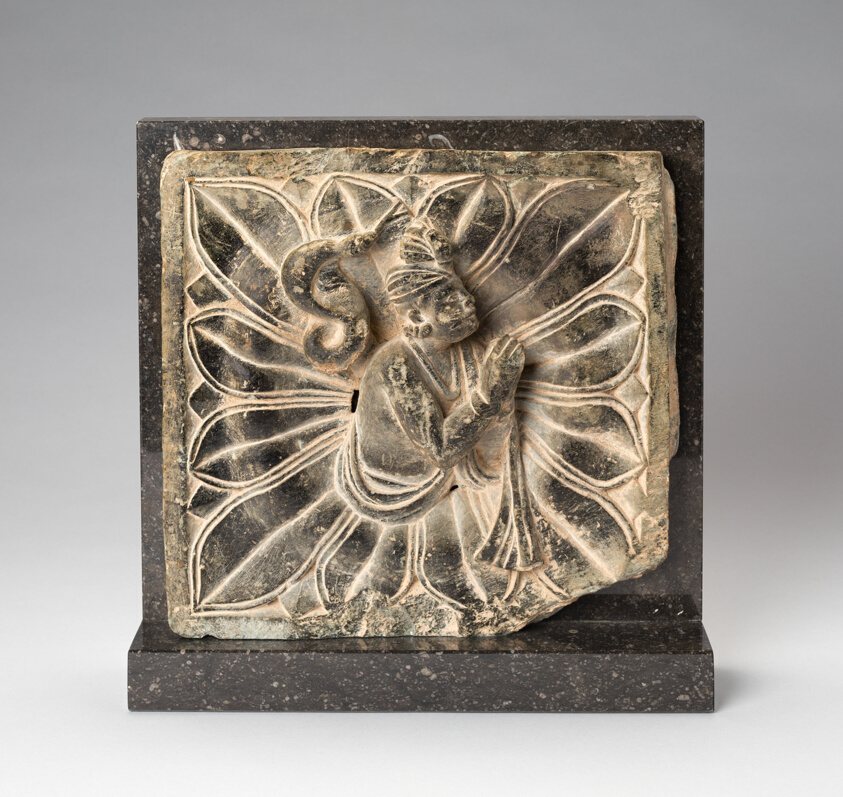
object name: Sculpture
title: Serpent King (Nagaraja) Emerging from a Lotus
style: South Asian, gandharan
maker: Pakistan; Ancient region of Gandhara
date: 2nd century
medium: Gray schist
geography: Gandhara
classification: schist; stone; sculpture; asian art